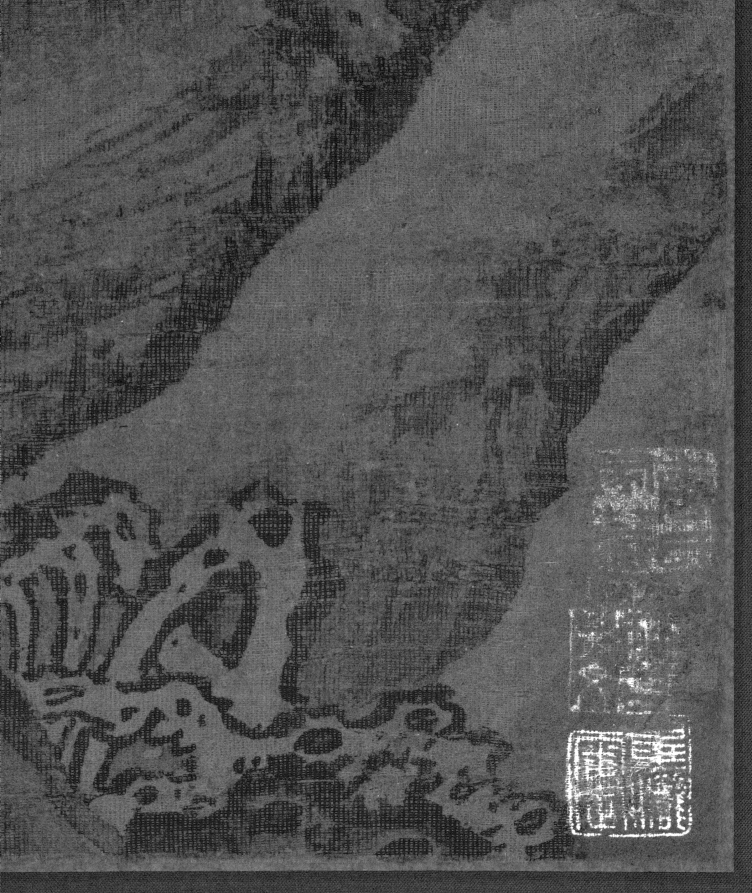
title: Waterfall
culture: China, Song dynasty (960-1279) - Yuan dynasty (1271-1368)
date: 1271–1368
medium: hanging scroll, ink and slight color on silk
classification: Painting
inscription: Label on the mounting with 2 seals of T'ang ? of Pi-ling (16th c.); label on back of mounting of Kü Kuang-hsü (1731-1797). 1 colophon and 8 additional seals: 1 colophon, dated 1625, and 2 seals of Kao P'an-lung (1562-1626); 2 seals of Liu Shu (1759-1816); 1 seal of Pi Lung (late 18th c.); 1 seal of Ts'ao tzu-wen; 2 seals unidentified. WKH